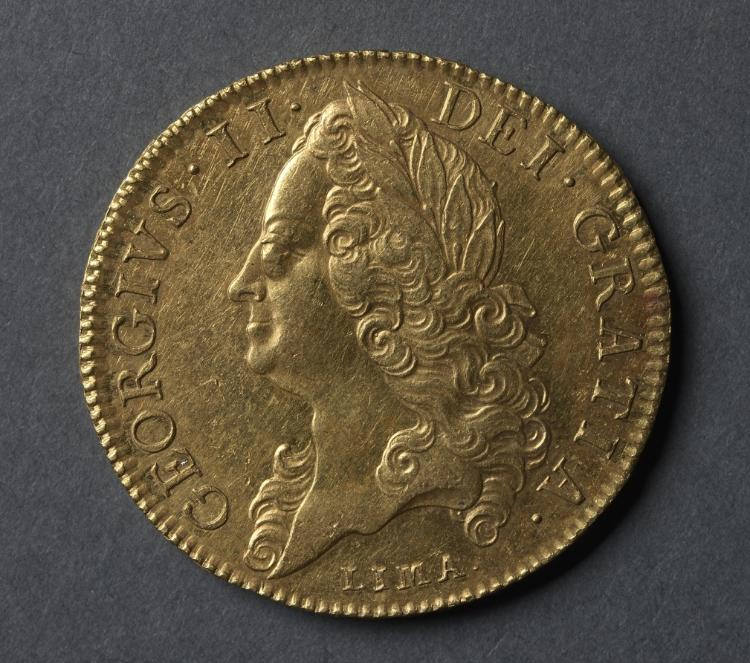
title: Five Guineas: George II (obverse)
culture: England, George II, 1727-1760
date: 1746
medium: gold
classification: Coins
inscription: DEI . GRATIA . GEORGIVS . II; below: LIMA.